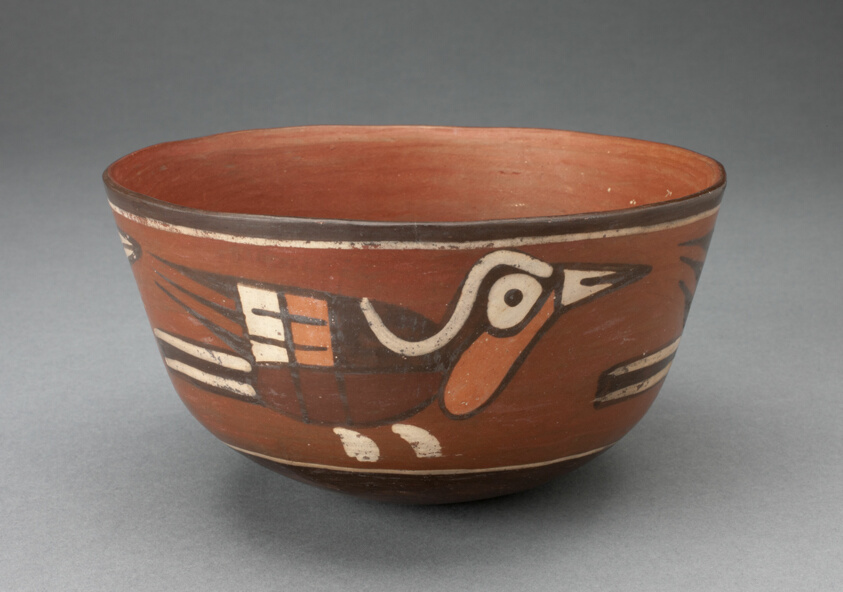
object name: Vessel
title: Bowl Depicting Birds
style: nazca, early intermediate period, Pre-Columbian, americas, Arts of the Americas, andean, andes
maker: Nazca; South coast, Peru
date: 180 BCE–500 CE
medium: Ceramic and pigment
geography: Nazca Valley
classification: bowl; earthenware; art of the americas; ceramics; vessel